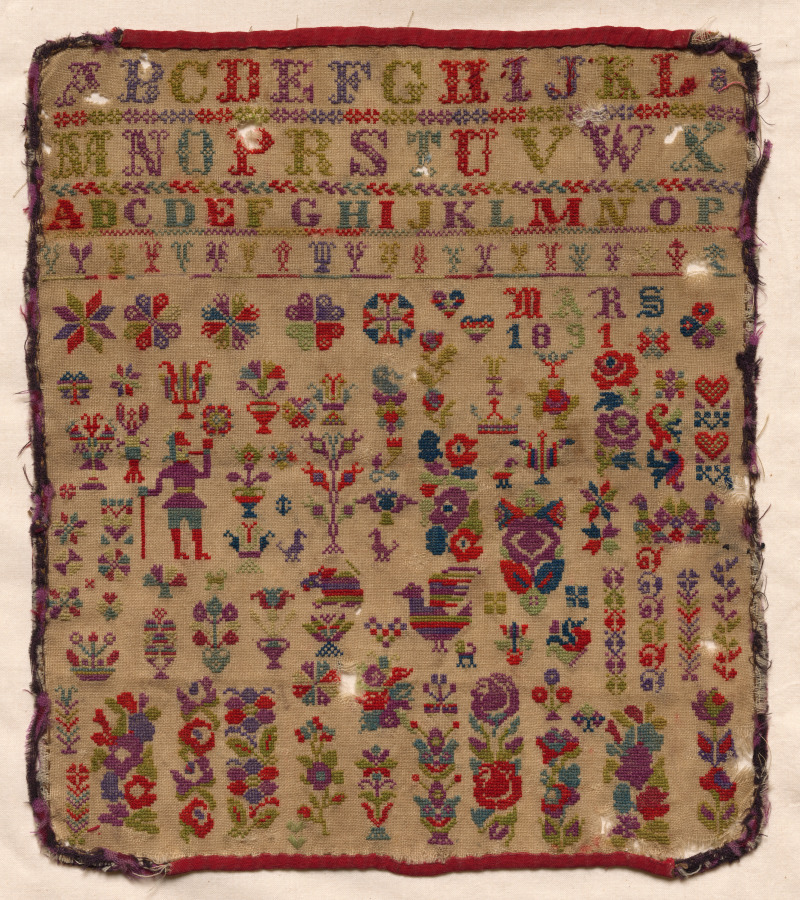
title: Sampler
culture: Czechoslovakia, late 19th century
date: 1891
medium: embroidery; coarse linen ground, wool cross stitch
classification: Sampler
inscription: alphabet across top; below: "MARS/1891."